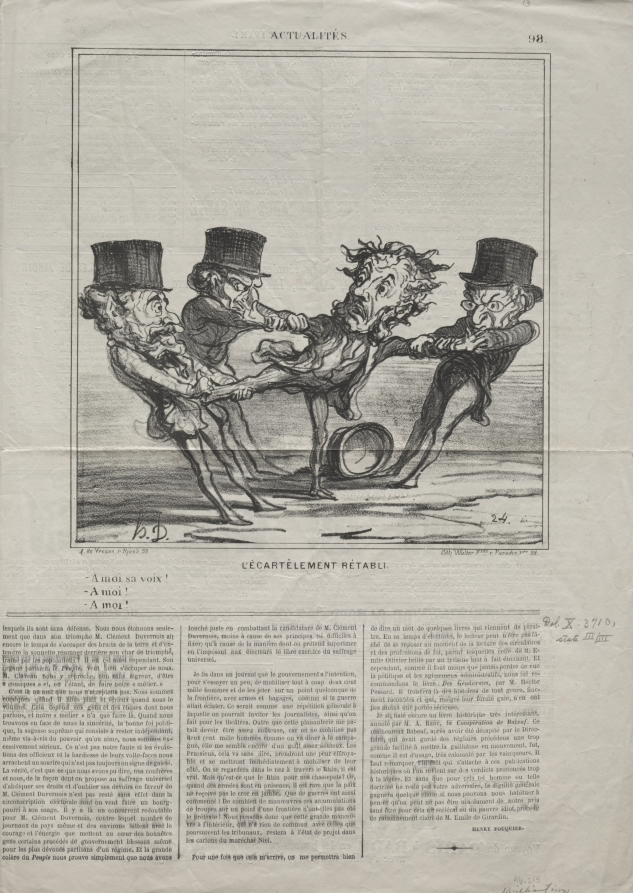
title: Quartering Reinstated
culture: France, 19th century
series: News of the Day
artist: Honoré Daumier (French, 1808–1879)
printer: Walter Frères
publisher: Arnaud de Vresse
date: 1869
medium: lithograph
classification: Print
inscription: Lower margin, printed: A de Vresse, r. Rivoli, 55 / Lith. Walter Fres. r. Paradis Pre.. 28 ; Upper margin, pencil 13 ; lower page, next to newsprint, pencil: Del. X. 3710, / state III/III / 46.205 / Brilliant imp.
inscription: Above image, printed: ACTUALITÉS. / 98 ; Below image, printed: L'ÉCARTÈLEMENT RÉTABLI. / - A moi sa voix! / - A moi! / - A moi!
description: This print was published in Le Charivari (May 8, 1869) as plate 98 from the series News of the Day.